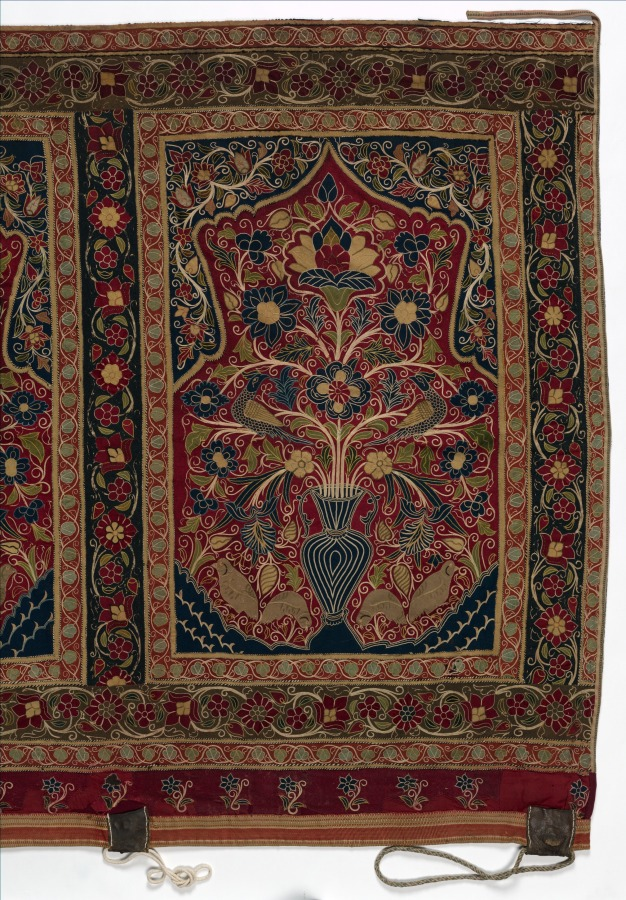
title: Royal Round Tent made for Muhammad Shah (wall panel with three design units)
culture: Iran, Rasht, Qajar period (1779-1925)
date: 1834–48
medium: Wool with silk embroidery (chain stitch), rope, cotton, leather, tape; Rasht work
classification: Textile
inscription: Inscriptions: The central design unit of this wall panel has two embroidered inscriptions. 1. Upper inscription (center of the top blossom): "Muhammad shah sultan-e ghazi."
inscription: 2. Lower inscription (on the base of the vase): "Kamtarin bandeh-ye dargah fath'ali."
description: Royal tents were potent symbols of authority, wealth, and power throughout the greater Middle East. Rulers owned thousands of tents. They were used for shelter, shade, and innumerable functions in tent compounds that were essential for imperial ceremonies, travel, and military campaigns. Distinguished by size with elaborately decorated interior walls and ceilings, tents could be as large as castles. Opulent tents were also presented as imperial gifts. Tents are only known through documents before 1600. For example, in Baghdad in 809, Caliph Harun al-Rashid owned 4,000 ceremonial tents and 150,000 camping tents that were stored in the imperial Abbasid treasury. An astonishing variety and quantity of tents were housed in the royal Fatimid tent storeroom in Cairo in 1068-69, including "military tents, fortress tents, and castle tents, manufactured of . . . gold-brocaded stuff embroidered with designs of elephants, wild beasts, horses, peacocks, birds." Since 1600, Ottoman Turkish tents with elaborate floral decoration have been preserved in Istanbul in the Topkapi Palace Museum and Military Museum, and in European collections as war booty, primarily from the Ottoman Turks' attempt to conquer Vienna in 1683. These tents are not done in the Rasht technique, but rather are applique. In contrast, royal tents from Iran are extremely rare. This spectacular ceremonial tent is embroidered with the name of its owner, Muhammad Shah, who ruled Iran from 1834 to 1848 during the Qajar dynasty. The radiant jewellike interior features exuberant flora, blossoming vines, and robust birds made with colored wool embellished with silk-thread embroidery.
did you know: Rasht work is named after the city on the Caspian Sea in present-day Iran, which was a major silk trade center with numerous textile workshops.